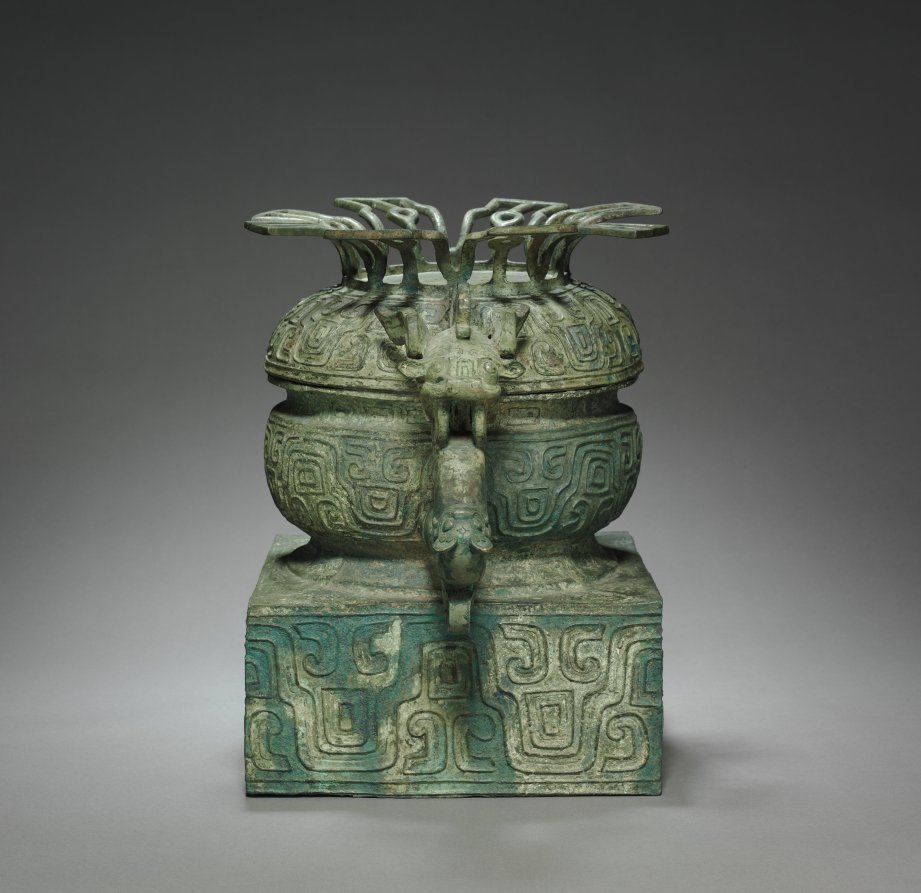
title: Food Container (Gui)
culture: China, Eastern Zhou dynasty (770–256 BCE), Spring and Autumn period (770–476 BCE)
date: 600–500 BCE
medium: bronze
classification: Metalwork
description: Openwork and sculptural designs elaborately transform the silhouette of this gui, a ritual food vessel with a square pedestal. The design exudes motion, exuberance, and baroque characters to a stately vessel form. Lotus-petal openwork encircles the cover, reinforcing the linear rhythms of the undulating wave patterns on the body. Two lively dragons, with eyes and mouth wide open and tongue straight out, are accompanied by two felines to form the arched handles.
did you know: This ritual food vessel likely held grain like rice, millet, or corn in rites for worshipping the ancestors.